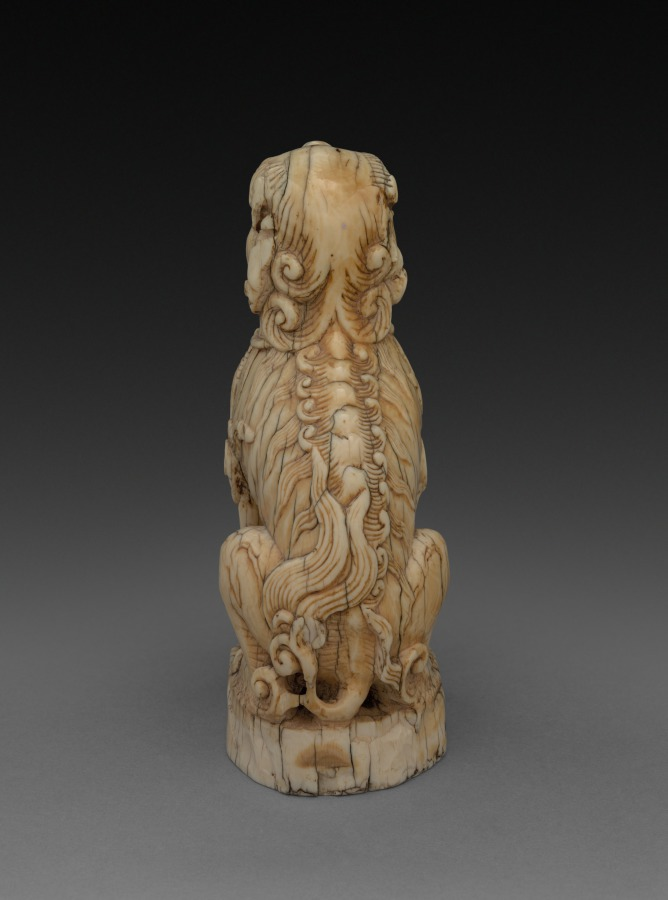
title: Lion Dog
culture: China, Song dynasty (960-1279) - Yuan dynasty (1271-1368)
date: 13th - 14th century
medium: ivory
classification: Ivory